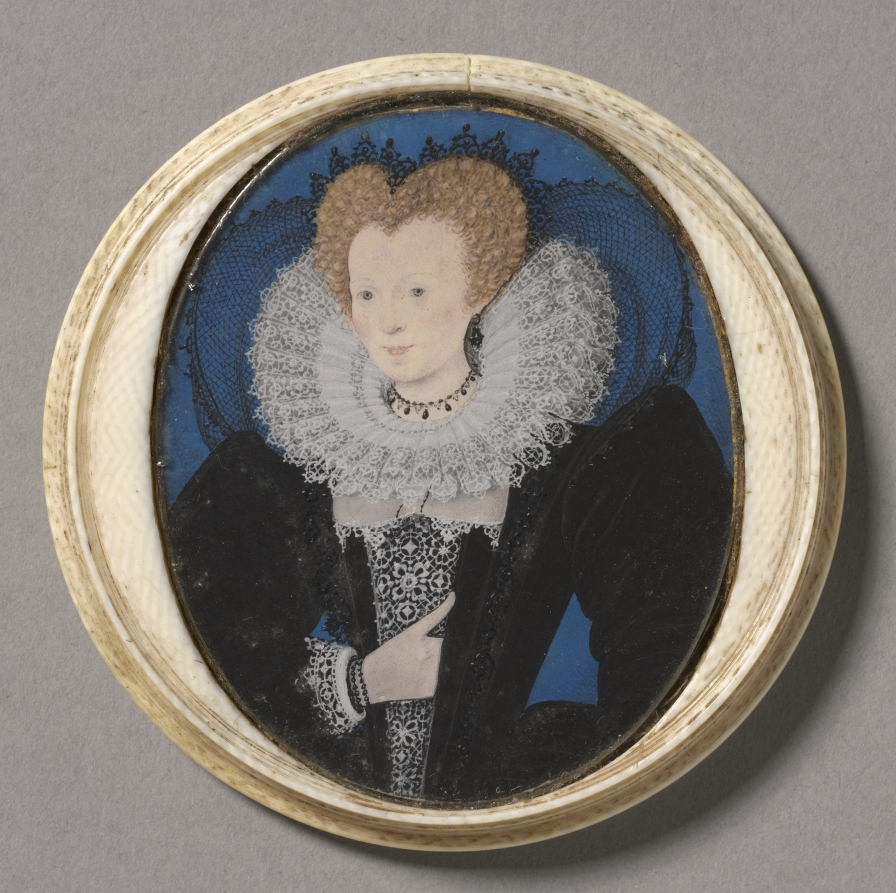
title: Portrait of a Woman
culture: England, 16th century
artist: studio of Nicholas Hilliard (English, c. 1547–1619)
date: 1590s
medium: watercolor on vellum in original turned ivory case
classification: Portrait Miniature